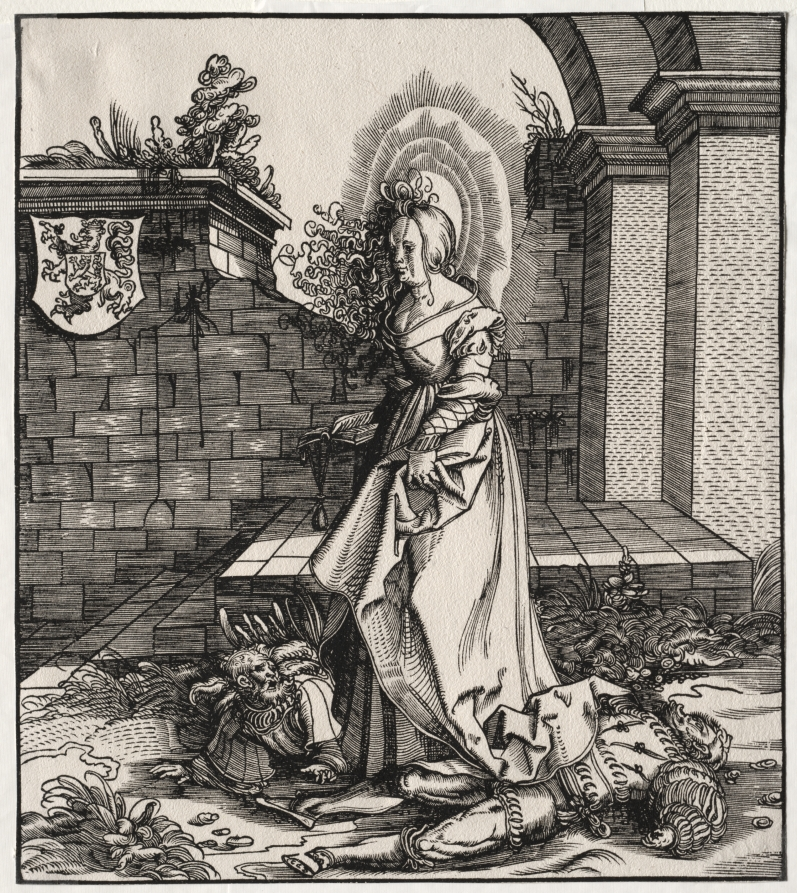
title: Saints Connected with the House of Hapsburg: A General Account of the Ancestry of Emperor Maximilian I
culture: Germany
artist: Leonhard Beck (German, c. 1480–1542)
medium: woodcut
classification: Print